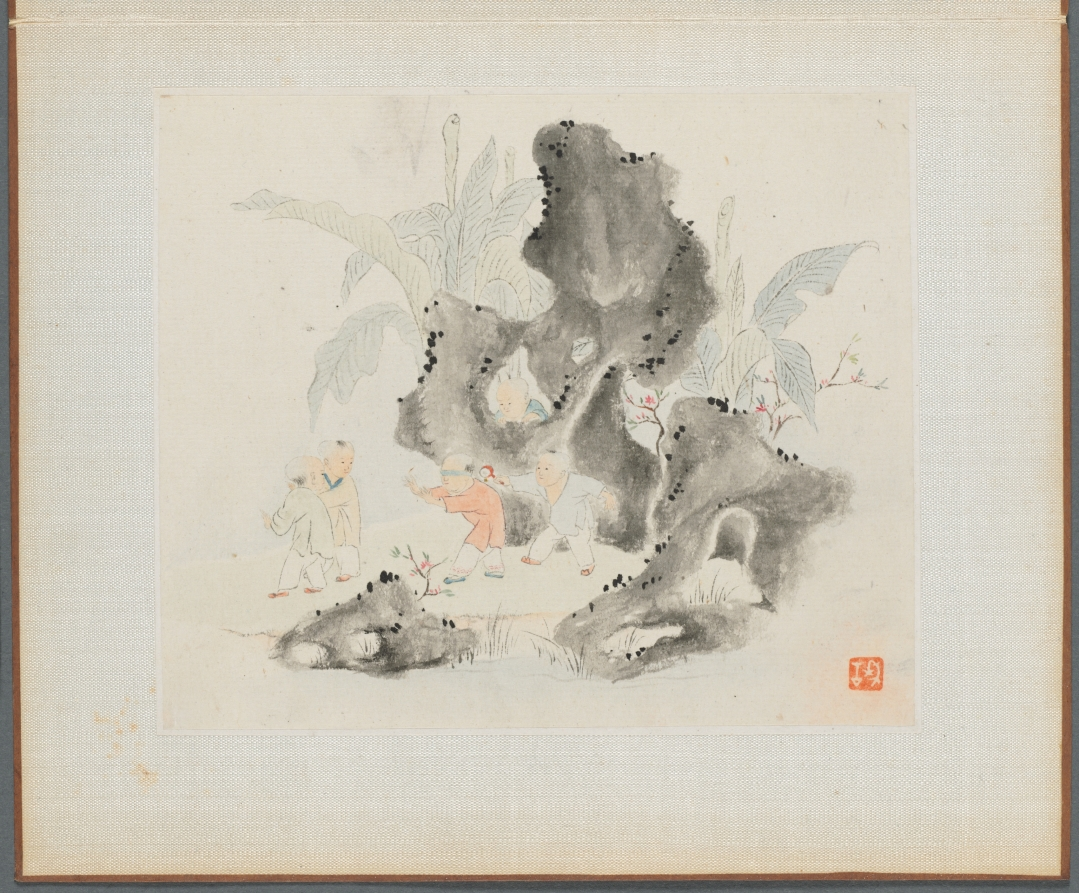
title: Album of Landscape Paintings Illustrating Old Poems: Children Playing Blindman's Buff in a Garden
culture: China, Qing dynasty (1644-1911)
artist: Hua Yan (Chinese, 1682–c. 1765)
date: 1745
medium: Album leaf; ink and light color on paper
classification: Painting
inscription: Seal, lower right corner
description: Hua Yan is one of the Eight Eccentrics of Yangzhou, who rejected orthodox ideas about painting.